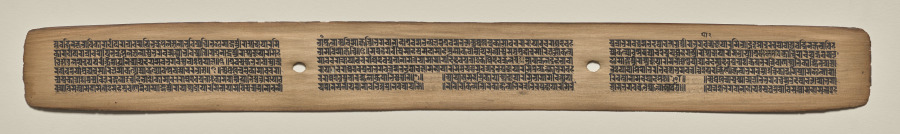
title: Text, Folio 100 (recto), from a Manuscript of the Perfection of Wisdom in Eight Thousand Lines (Ashtasahasrika Prajnaparamita-sutra)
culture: Eastern India, Bihar, Vikramashila Monastery. Painting: Nepal, Kathmandu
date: Sunday, September 14, 1119 (year 239 of the Newar Samvat in the month of Ashvina)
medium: gum tempera and ink on palm leaves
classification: Painting